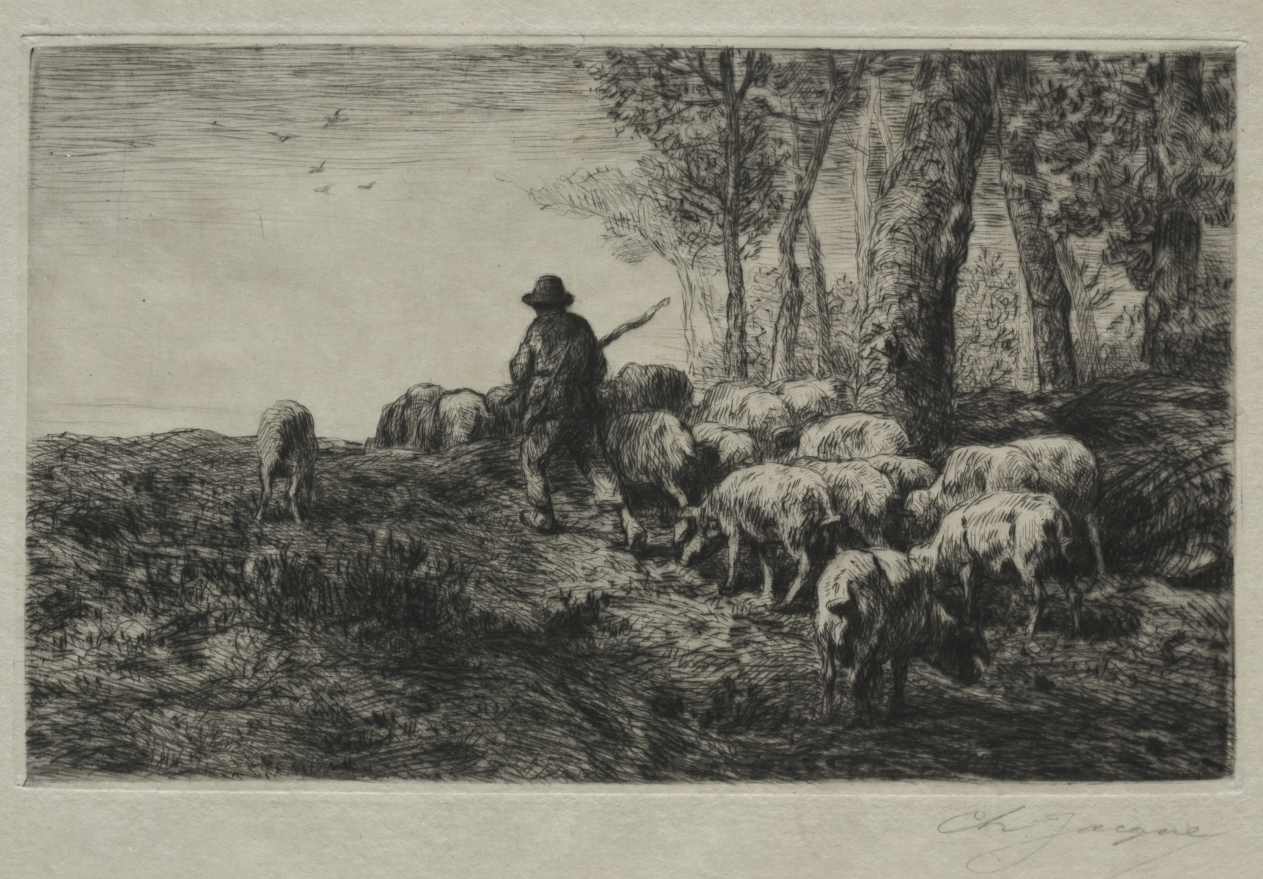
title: A herd of swine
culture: France, 19th century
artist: Charles-Émile Jacque (French, 1813–1894)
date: 1880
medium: drypoint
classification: Print